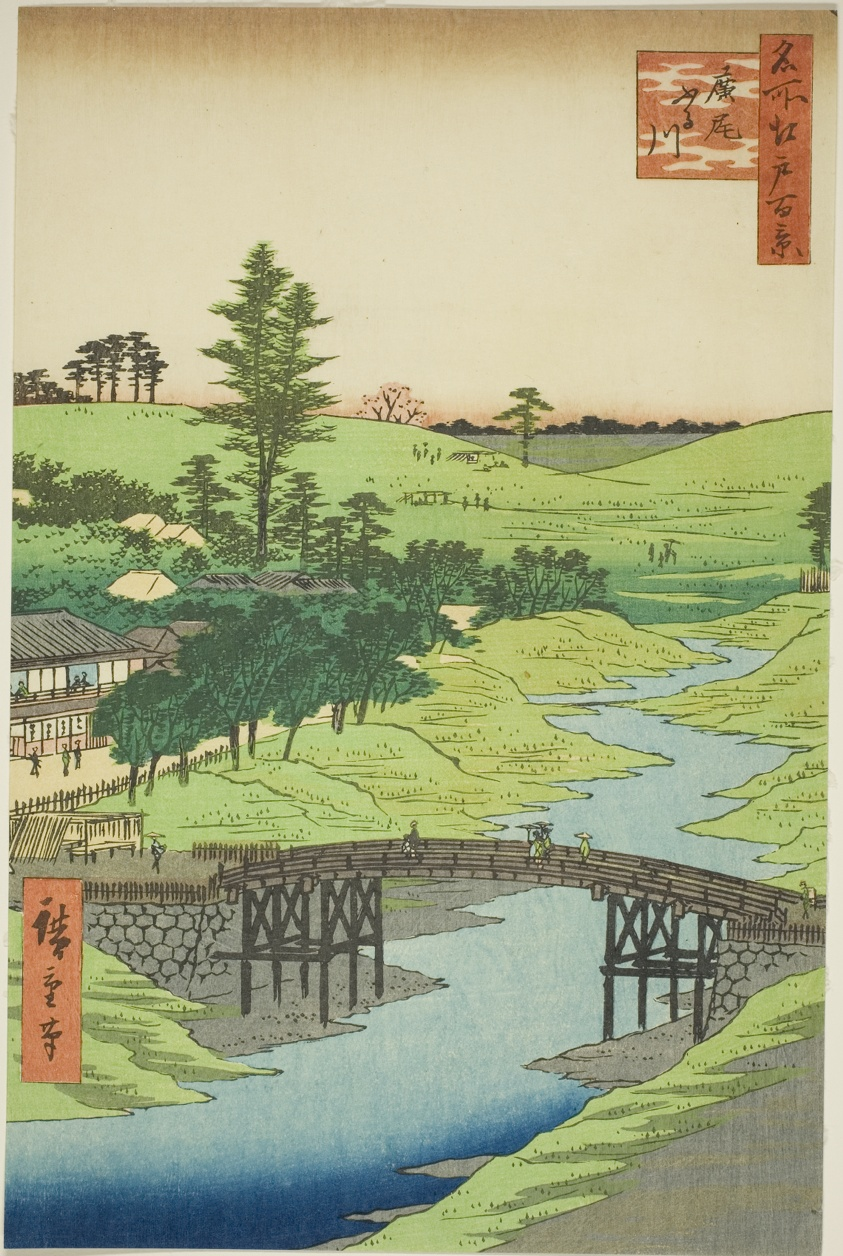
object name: Print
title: Furukawa River, Hiroo (Hiroo Furukawa), from the series "One Hundred Famous Views of Edo (Meisho Edo hyakkei)"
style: Japanese (culture or style)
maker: Utagawa Hiroshige 歌川 広重; Japanese, 1797-1858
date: 1856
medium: Color woodblock print; oban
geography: Japan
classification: woodblock print; print; asian art